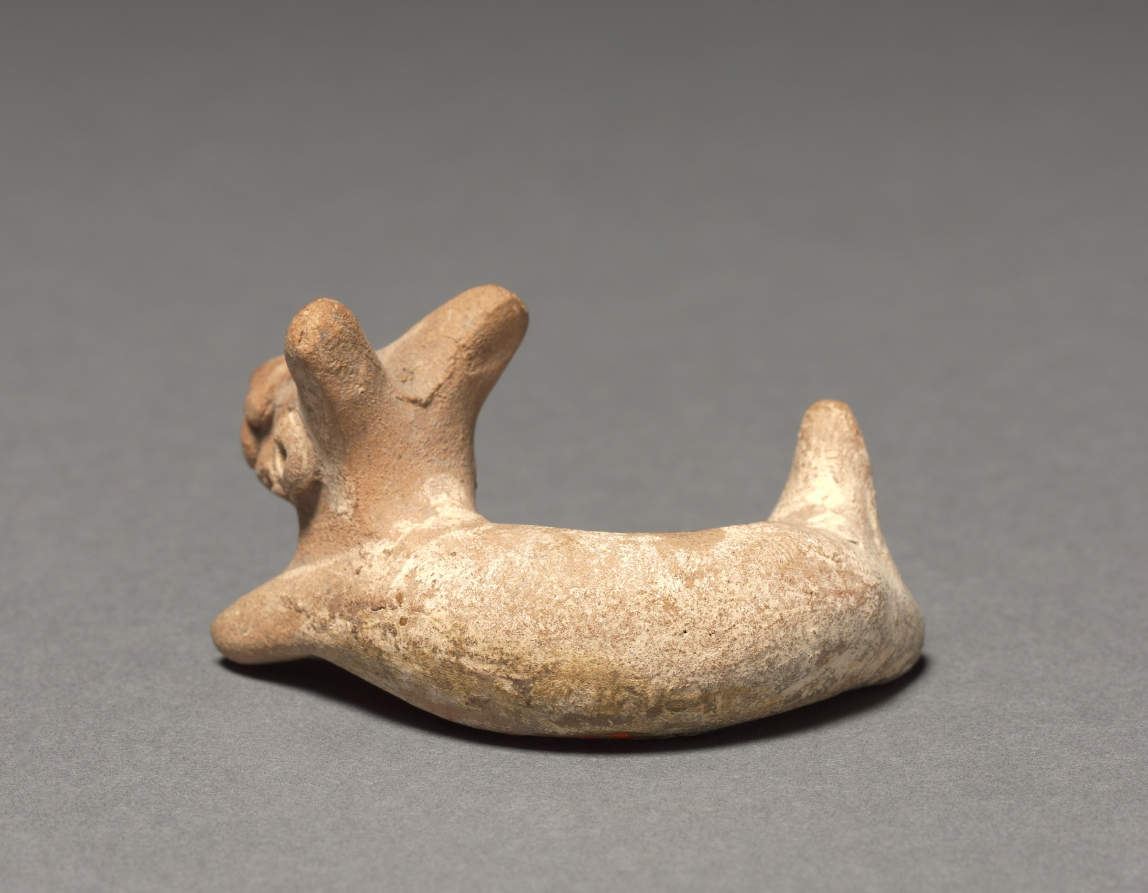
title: Animal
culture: Mexico, Western, Colima (?)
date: 200 BCE–300 CE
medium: terracotta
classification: Ceramic